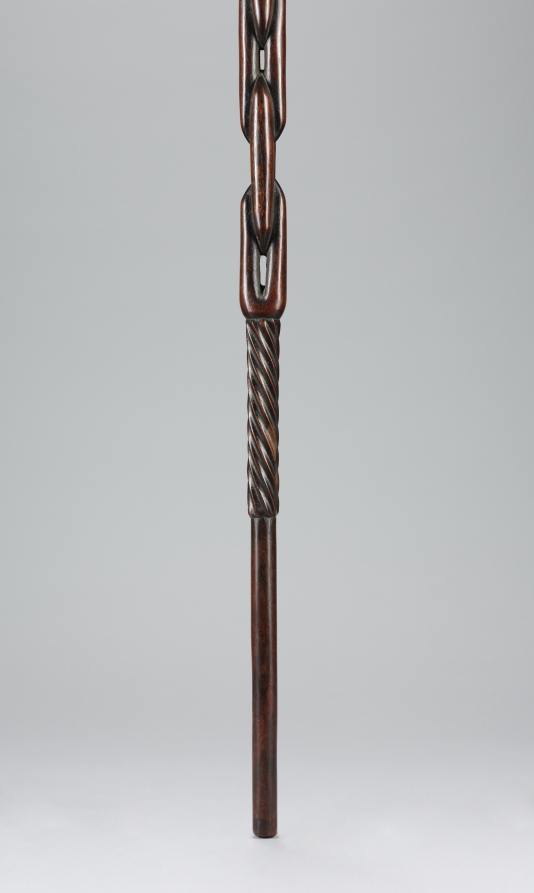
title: Prestige Staff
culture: Africa, Southern Africa, South Africa, Tsonga-style or Zulu-style maker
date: 1800s–1900s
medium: Wood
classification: Implements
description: The primary use of long staffs like this was purely practical; they served as walking companions when their pastoralist-owners covered long distances accompanying their cattle in search of new pastures. The tall height of this staff indicates the elevated status or special function of the man who owned it. Carved from one piece of wood, its spherical knob finial and the geometric designs incorporated into its shaft decoration—consisting of spiraling segments and chain links—demonstrate its maker’s superior skills.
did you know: Tsonga and Zulu staffs all have strong symbolic associations and value. They visually connect the identity of their owners with that of their ancestors and with that of the community to which they belong.